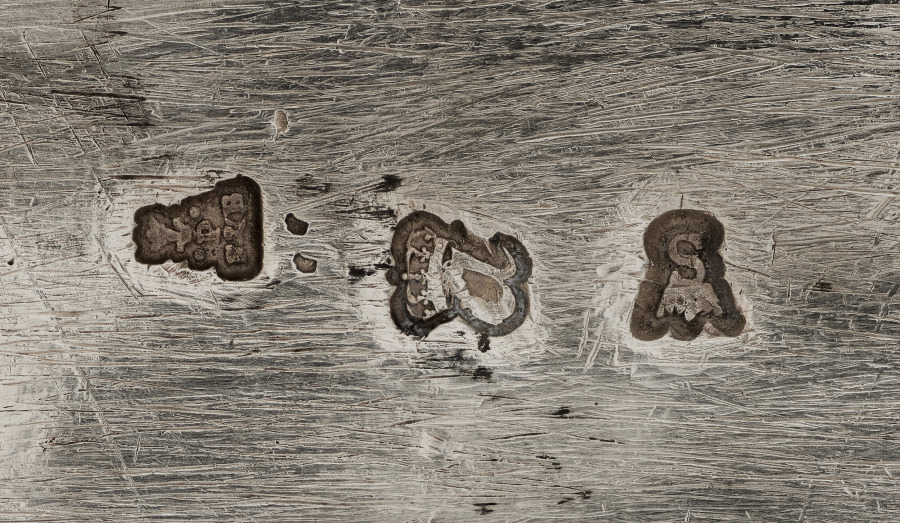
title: Tureen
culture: France, Paris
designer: Juste-Aurèle Meissonnier (French, 1695–1750)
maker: Pierre-François Bonnestrenne (French)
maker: Henry Adnet (French, 1745)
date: 1735–38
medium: silver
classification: Silver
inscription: engraved Meissonnier signature.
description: See entry for cover record 1977.182.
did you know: The langoustine, pigeon, and vegetables were cast using real examples giving the silver copies lifelike detail and appearance.